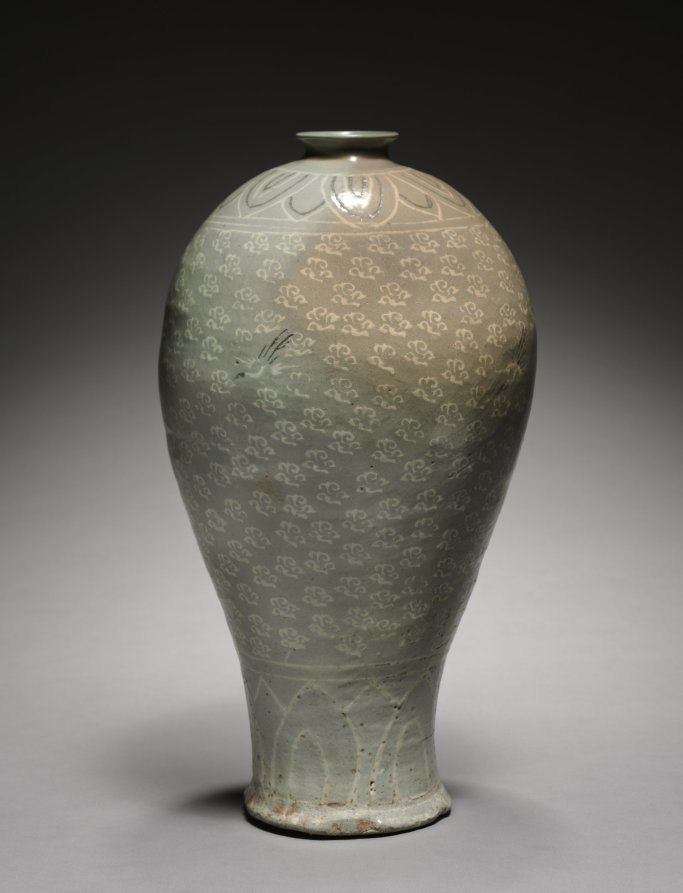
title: Prunus Vase with Inlaid Clouds and Flying Cranes Design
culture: Korea, Goryeo dynasty (918–1392)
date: 1300s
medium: celadon ware with inlaid white and black slip decoration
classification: Ceramic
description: As early as the seventh century, the practice of drinking tea and wine became an important part of elite culture in Korea. Once used to store alcoholic beverages, this type of vase features a wide body followed by a sharply rounded shoulder, a short neck and a small opening. Most of the remaining examples no longer have a lid, but originally it may have had a lid that not only covered the opening, but also served as a cup.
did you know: Prunus vases such as this one are often believed to contain a branch of plum blossoms, but recent research reveals that these lidded vases were also used to contain cooking liquid such as sesame oil.